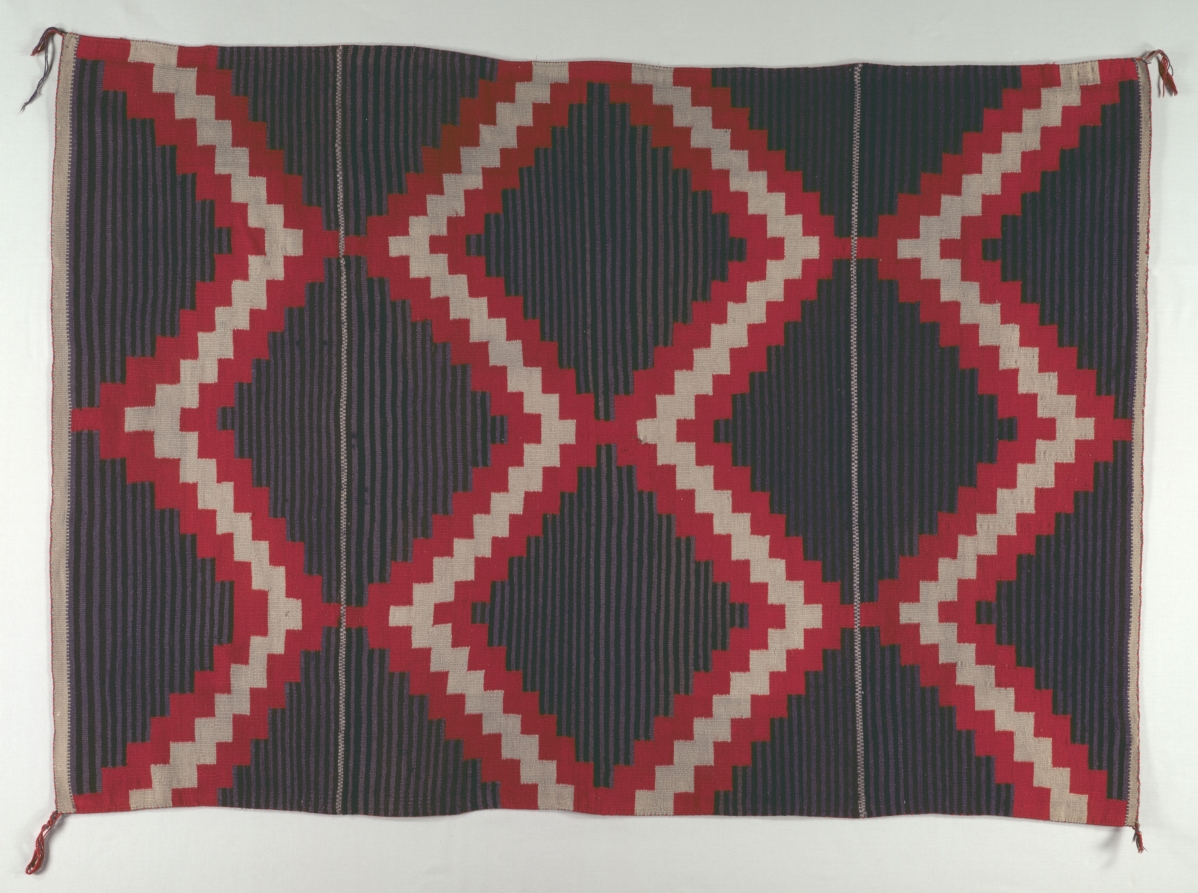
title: Hubbell Revival-Style Rug with Moki (Moqui) Stripes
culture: America, Native North American, Southwest, Navajo (Dine), female artist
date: c. 1890–1910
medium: Wool (Germantown): tapestry weave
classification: Textile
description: Navajo blankets are splendid microcosms of the Southwest’s cultural richness. This example has two old Navajo designs: the terraced diamond and the striped moki pattern. Moki’s origin is unclear. It may have come from Pueblo peoples, from whom the Navajo learned weaving after migrating to the Southwest from Canada. Or it could have come from the Spaniards, who arrived in the Southwest in 1540, not long after the Navajo. Though the patterns are old, the blanket was created around 1900 when Navajo weavers began to innovate for the Anglo market, and wearing-blankets, which were worn around the shoulders, became rugs sold to outsiders. In Navajo legend, weaving is connected to the mythic Spider-Woman, who on her loom wove the universe from cosmic materials. Weaving, then, is an activity charged with meaning. The Navajo place emphasis not so much on the final product but on the process, which they regard as a means of creating beauty and projecting it onto the world.